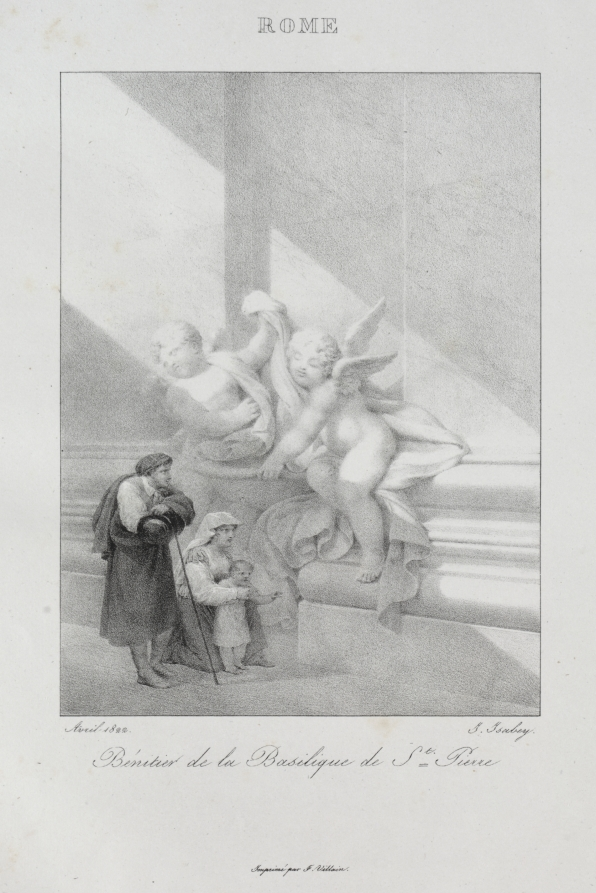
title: Voyage en Italie en 1822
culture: France, 19th century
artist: Jean-Baptiste Isabey (French, 1767–1855)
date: 1833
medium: lithograph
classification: Bound Volume